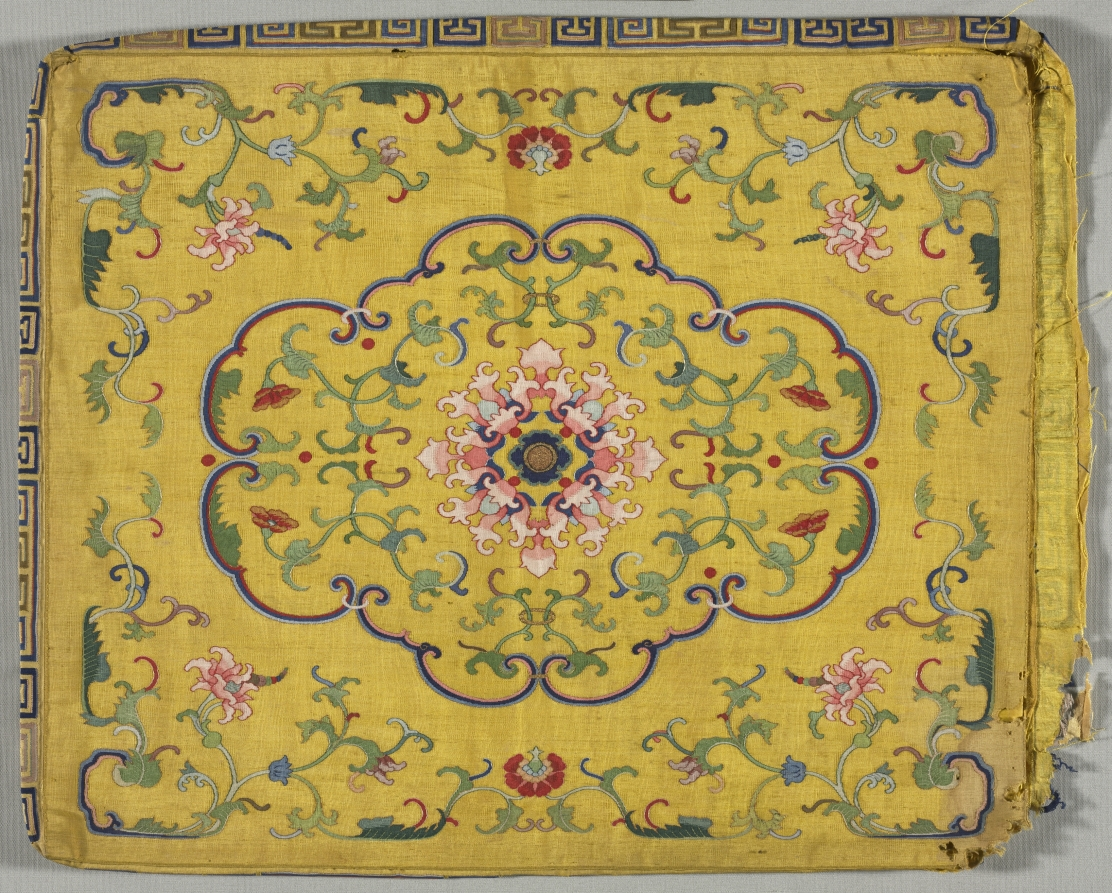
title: Cushion Cover (one of a set of four)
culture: China, Qing dynasty (1644-1911)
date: 1700s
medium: silk, metallic thread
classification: Textile